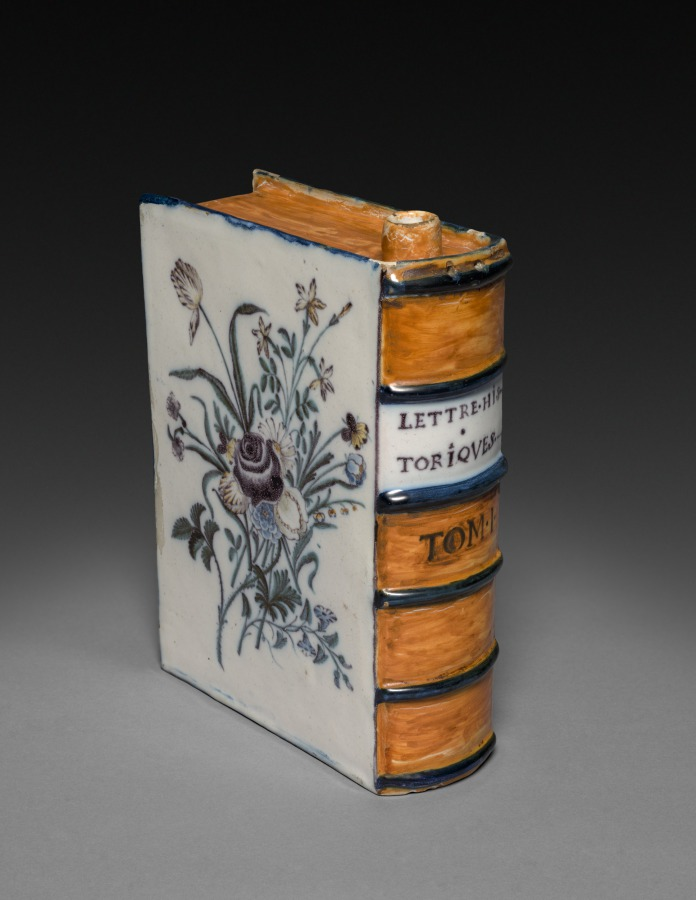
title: Hand Warmer or Flask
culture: France, Marseilles(?), mid 18th century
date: mid 1700s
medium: faience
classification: Ceramic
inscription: inscribed on spine: "LETTRE.HiS-/ . /TORiQVES . -- / TOM . I."